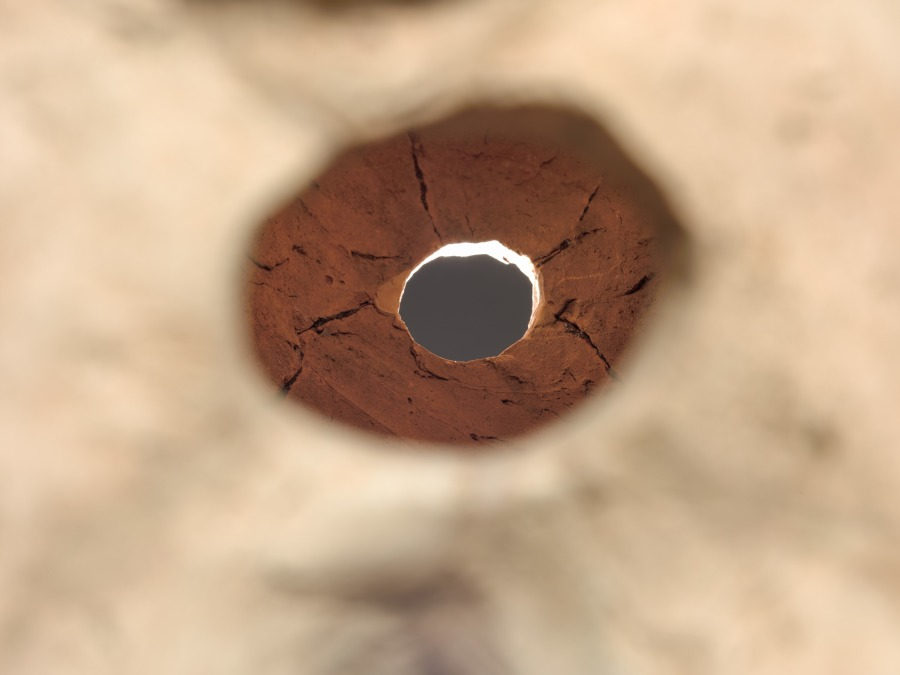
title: Haniwa Horse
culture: Japan, Kofun period (300–710 CE)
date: 400s–500s CE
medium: earthenware with traces of pigment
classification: Sculpture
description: This horse’s tack, with its round bells, resembles saddlery in fashion in Korea during the 400s–500s CE. Concurrent with mass migration from the Korean Peninsula, tombs covered with large earthen mounds similar to those on the Asian continent began to appear in Japan around the year 300 CE. Called “old mounds” (kofun), their surfaces were covered with hollow clay cylinders (haniwa). Sculptures of animals, buildings, and finally human figures followed, developing over the ensuing three centuries.